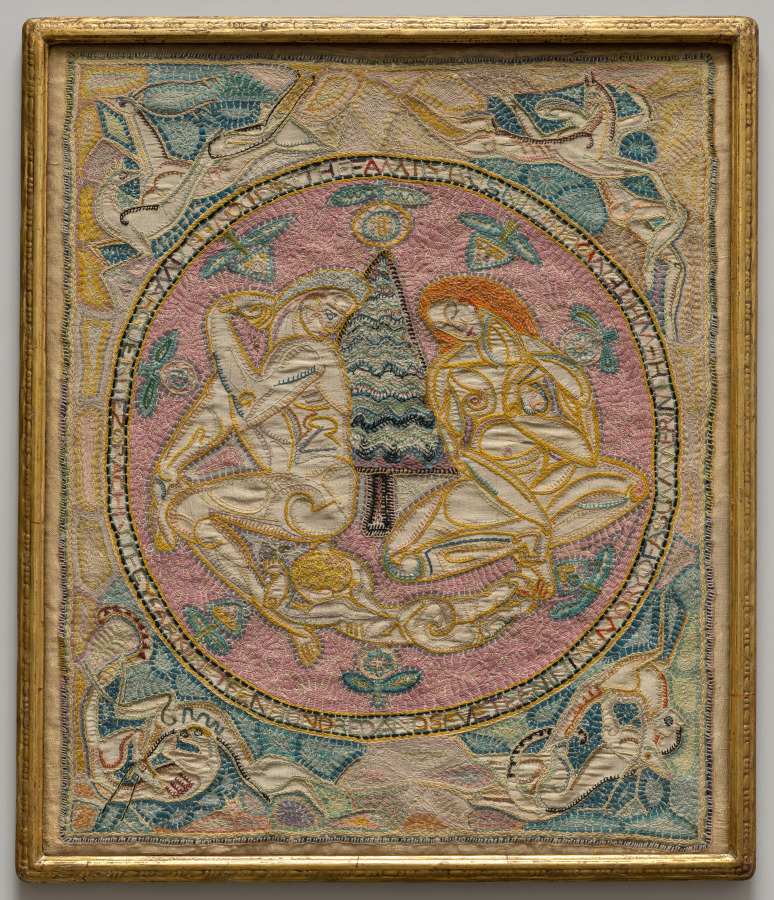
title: The Family (In Memory of a Summer in the White Mountains)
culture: America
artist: Marguerite Zorach (American, 1887–1968)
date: 1917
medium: plain weave silk; wool embroidery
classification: Embroidery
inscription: THE FAMILY / DONE BY MARGUERITE ZORACH IN THE YEAR NINETEEN HUNDRED AND SEVENTEEN IN MEMORY OF A SUMMER IN THE WHITE MOUNTAINS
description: Marguerite Zorach conceived her large, complex embroideries as major artistic statements at a time when the medium was routinely considered “craft,” as opposed to “fine art.” In doing so, she helped to erase such distinctions. One of her most acclaimed works, this example celebrates humanity in harmony with nature, presenting the artist, her husband (a Cleveland-raised sculptor named William Zorach), and their son amid an evergreen tree and four pairs of animals. Very time consuming to create, Zorach’s embroideries are rare.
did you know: In 1925, Zorach served as first president of the New York Society of Women Artists, an organization still in existence.